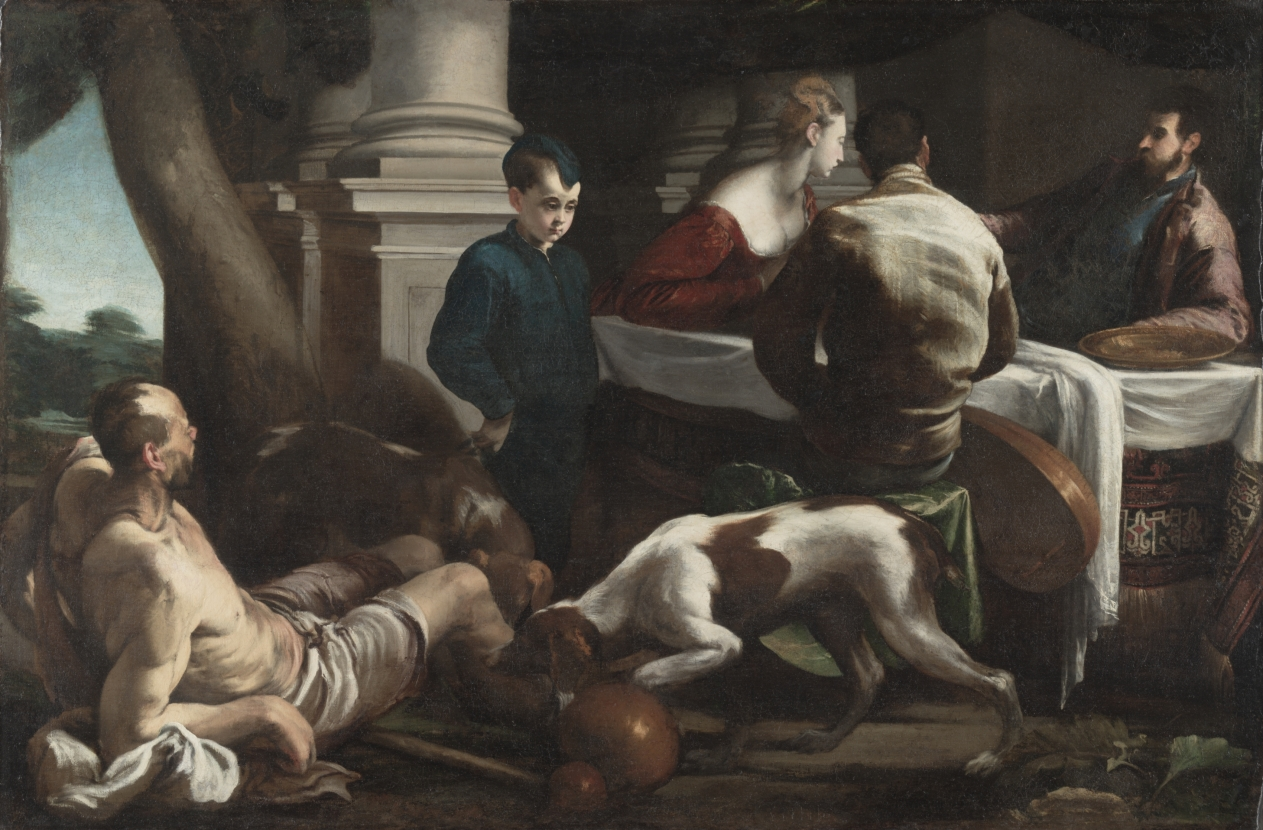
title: Lazarus and the Rich Man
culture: Italy, 16th century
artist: Jacopo Bassano (Italian, c. 1510–1592)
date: c. 1550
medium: oil on canvas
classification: Painting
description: The Biblical parable of Lazarus and the Rich Man (Luke 16:19-21) tells of a man who feasted and celebrated every day, while a beggar named Lazarus sat starving nearby. Dogs came to lick the sores on the poor man's body. However, when the two men died, Lazarus was welcomed into heaven, while the rich man was consigned to hell.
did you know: The Rich Man (far right) and Lazarus (far left) are both physically and socially opposed; while Lazarus reclines on the floor, the Rich Man relaxes on his lavish table.